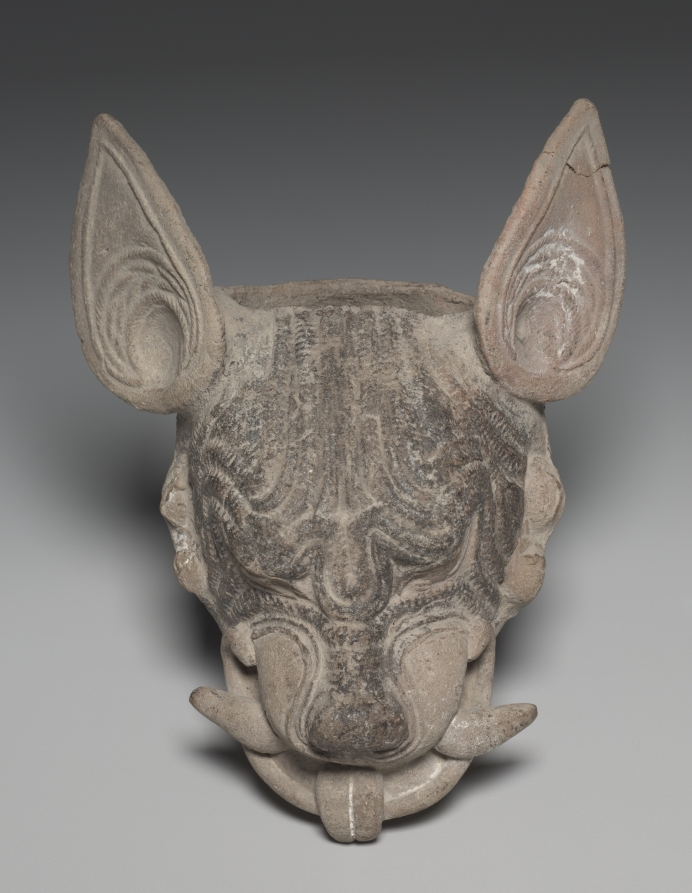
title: Dog Head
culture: Mexico, Gulf Coast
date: 500–1000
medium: earthenware, asphalt and resin paint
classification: Sculpture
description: This dog's snarl and protruding fangs lend him a sinister expression. Although pierced for suspension, the head seems too large and fragile to have been a pendant. Press-molds, used to create the dog's face and ears, were commonly used in the Gulf Coast region, where asphalt occurs naturally and was applied to pottery as a paint after firing.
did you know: This ceramic was analyzed using thermoluminescence dating; it was fired between 900 and 1,500 years ago.